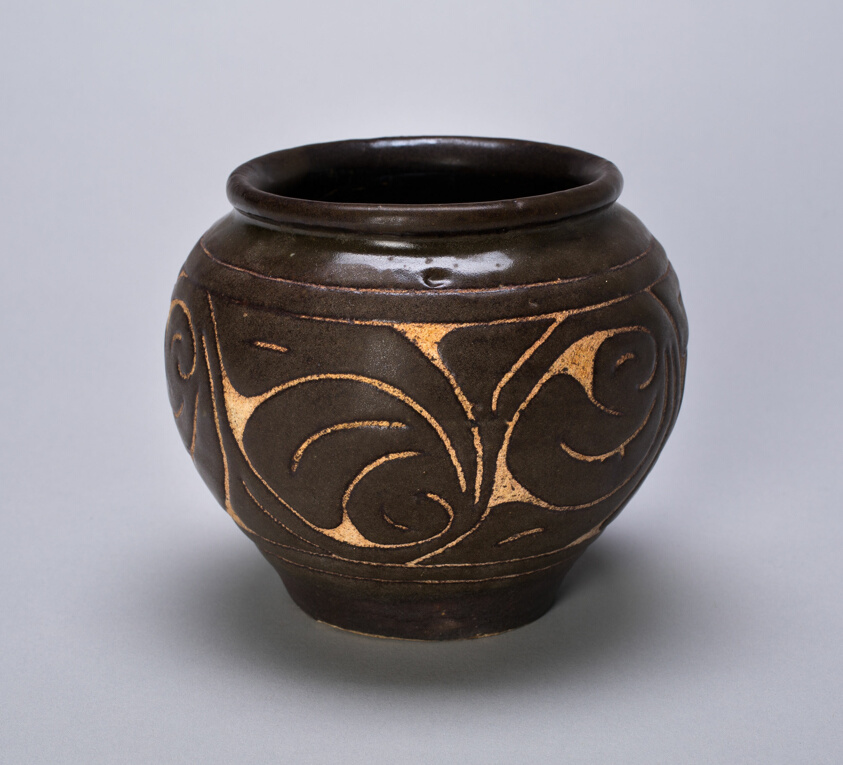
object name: Vessel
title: Small Globular Jar with Rolled Lip and Stylized Leaves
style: Chinese (culture or style)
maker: China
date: Jin dynasty (1115–1234)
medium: Cizhou ware; stoneware with carved-slip decoration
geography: China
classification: ceramics; vessel